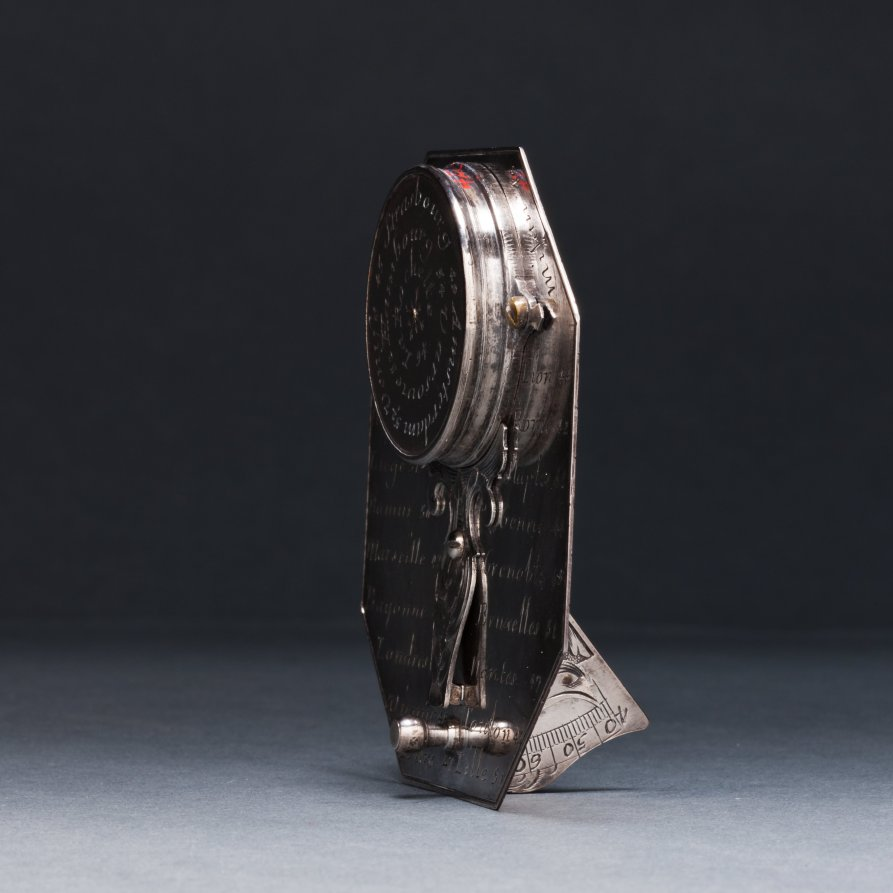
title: Butterfield Sundial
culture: France, 18th century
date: 1700s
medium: silver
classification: Silver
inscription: [Engraved signature above the compass in ribbon band]: "N. BION A Paris"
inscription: [Engraved on the face of the sundial]: “Pour 55° 4-5-6-7-8-9-10-11 50° IIII-V-VI-VII-VIII-IX-X-XI 45° 5-6-7-8-9-10-11 40° -VI-VII-VIII-IX-X-XI'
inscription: [Engraved on the other side]: "Pour 55° -8-7-6-5-4-3-2-1-0 50°-VIII-VII-VI-V-IIII-III-II-I 45°-8-7-6-5-4-3-2-1 40°-VII-VI-V-IIII-III-II-I"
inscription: [Engraved around the compass]: “NORD-OUEST-SUD-EST”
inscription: [Engraved on the back of the sundial]: “Turin 44 Milan 46 Paris 49 Lion 46 Metz 49 Rome 42 Liege 51 Naples 44 Namur 50 Gennes 44 Marseille 43 Grenoble 45 Bayonne 43 Bruxelle 51 Londres 52 Nantes 47 Vienne 48 Toulon 43 Tours 47 Lille 51”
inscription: [Engraved around the back of the compass]: “Venise 45 Strasbourg 49 Amsterdam 52 Hambourg 54 Varsovie 52 La Rochelle 46”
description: Butterfield-type sundials are characterized by their adjustable gnomons, metal flaps that cast a shadow on the dial’s face to indicate the hour, and geographical indices. This sundial has a scale adjustable between latitudes of 40° to 60° north. The latitudes of 26 European towns are engraved on its back for quick reference. With an intricately engraved silver face, it would have functioned as a fashionable traveler’s accessory.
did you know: Butterfield-style sundials were named after Micheal Butterfield, an English scientific and mathematical instrument maker who worked in Paris between 1674 and 1724.